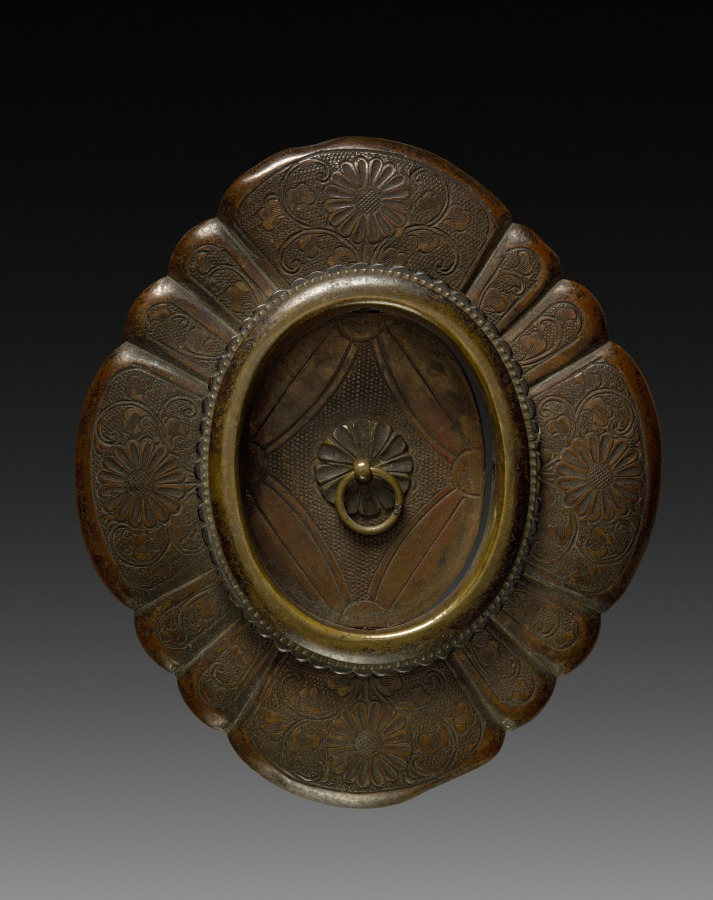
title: Door Pull (Hikite)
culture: Japan, Edo period (1615–1868)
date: early to mid-1800s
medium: bronze (?)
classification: Metalwork